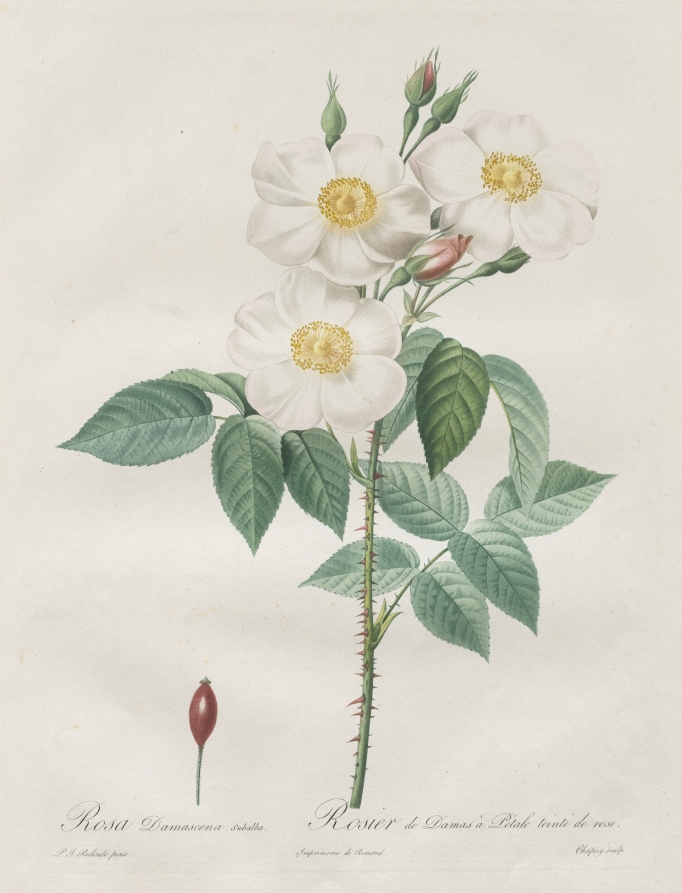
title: Les Roses: Rosa Damascena, subalba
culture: France, 19th century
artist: Henri Joseph Redouté (French, 1766–1853)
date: 1817–1824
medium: stipple and line engraving, with hand coloring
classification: Print